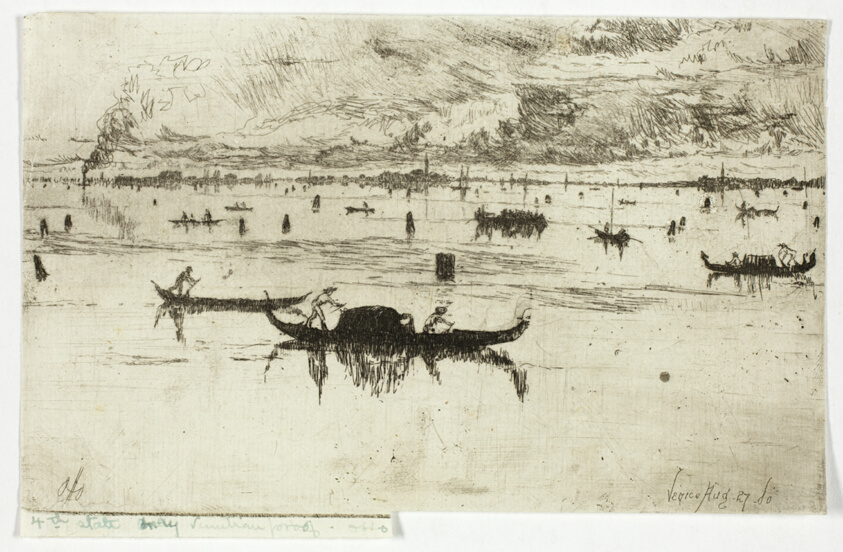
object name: Print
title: Laguna Veneta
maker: Otto Henry Bacher (American, 1856-1909)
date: 1880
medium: Etching with foul biting in black, with selective wiping of plate tone, on ivory laid paper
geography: United States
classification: etching; print; prints and drawing